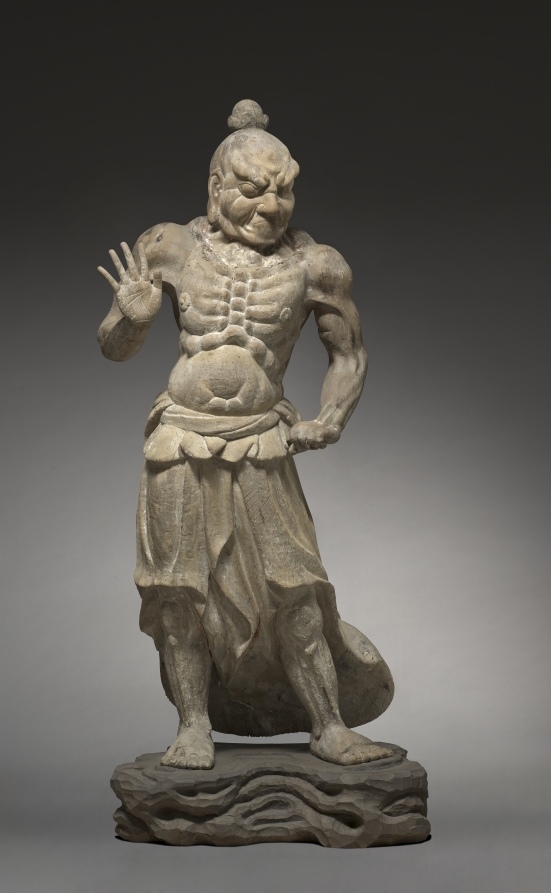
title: Guardian Figure: Nio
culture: Japan, Kamakura period (1185–1333)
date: 1200s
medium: chestnut and cypress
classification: Sculpture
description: A pair of guardians usually stands at the entrance of Japanese Buddhist temples. Traditionally, the pair included a closed-mouth figure, one hand displayed as if indicating his potential power, and an open-mouth figure, expelling his full force against evil spirits. Nio figures were usually displayed outdoors, often with just the roof of the entrance gate as protection, and as such were particularly susceptible to weathering.